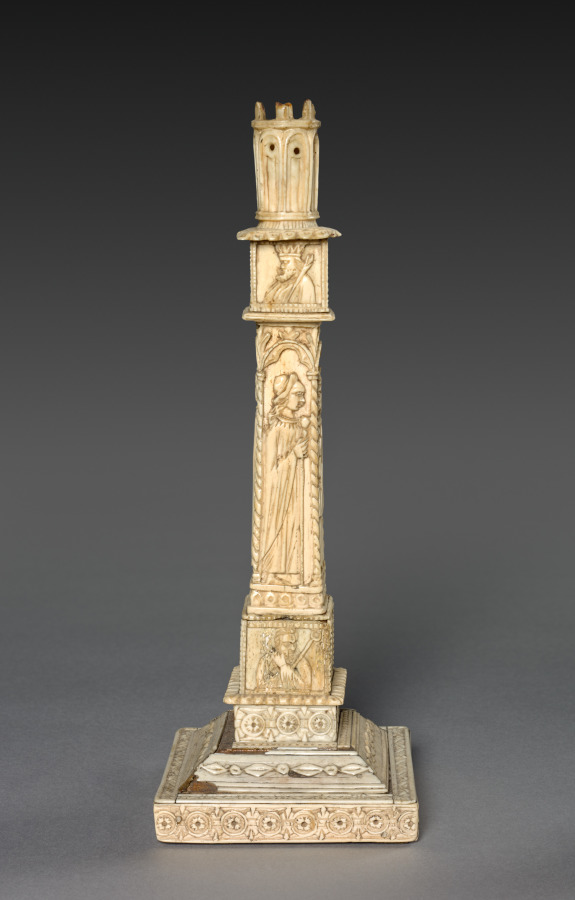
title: Candlestick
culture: Italy, 15th century style (possibly 19th-early 20th century)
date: 1800s - early 1900s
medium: ivory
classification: Ivory